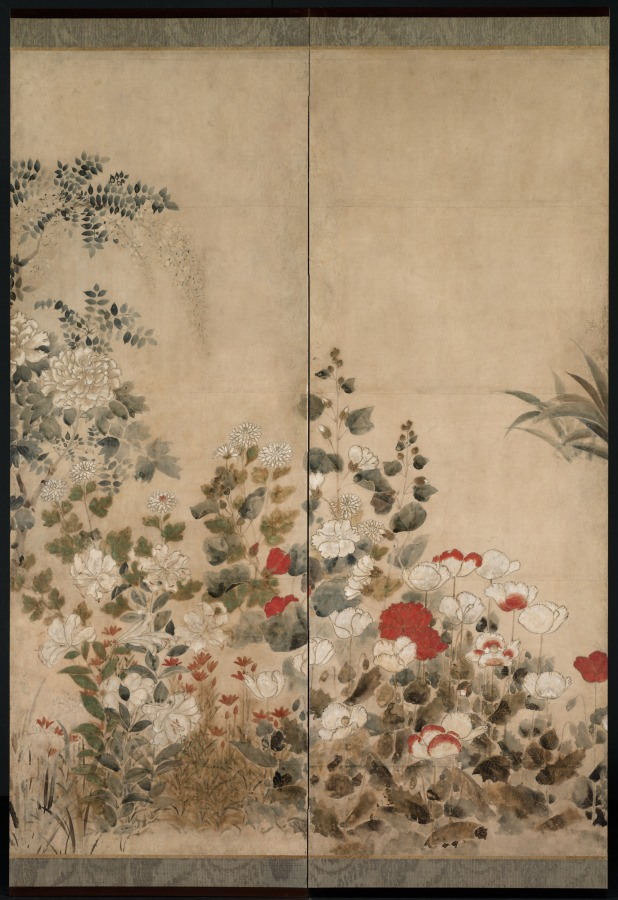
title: Flowers and Grasses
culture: Japan, Edo period (1615–1868)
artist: Kitagawa Sōsetsu (Japanese, active 1639–50)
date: mid-1600s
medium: One of a pair of six-panel folding screens; ink and color on paper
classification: Painting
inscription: two seals, lower right: "I-nen; Sosetsu"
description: Kitagawa Sōsetsu painted for the Maeda family, powerful rulers of what is present-day Ishikawa Prefecture on the central northern coast of Honshū, Japan’s main island. Screens served as room dividers and backdrops in Maeda grand residences. This composition is considered one of the artist’s masterpieces. Kitagawa Sōsetsu is thought to have been a student of Tawaraya Sōsetsu, who was in turn the student of Tawaraya Sōtatsu, the Kyoto-based master painter regarded as the creator of the style that came to be known as Rinpa. By selecting a painter of this lineage, the Maeda family consciously connected their aesthetics to those of the imperial capital as a means of proclaiming their elevated status.